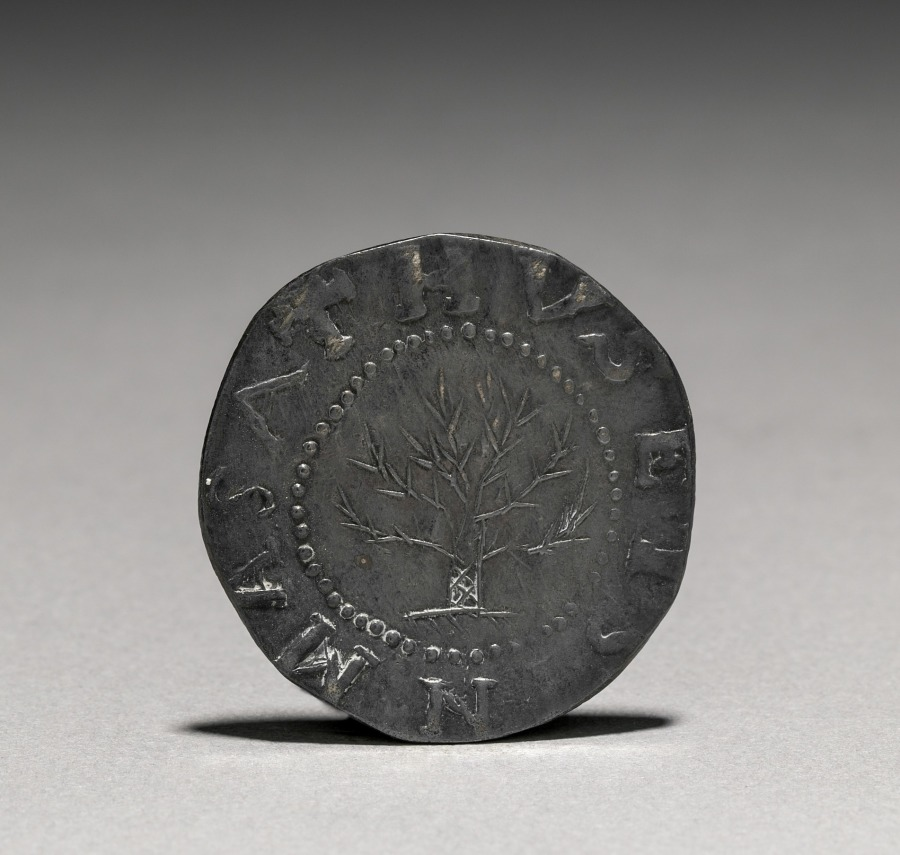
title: Shilling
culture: America, Massachusetts, Boston, 17th century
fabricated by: John Hull (American, 1624–1683)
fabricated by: Robert Sanderson (American, 1609–1693)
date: 1652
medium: silver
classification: Coins